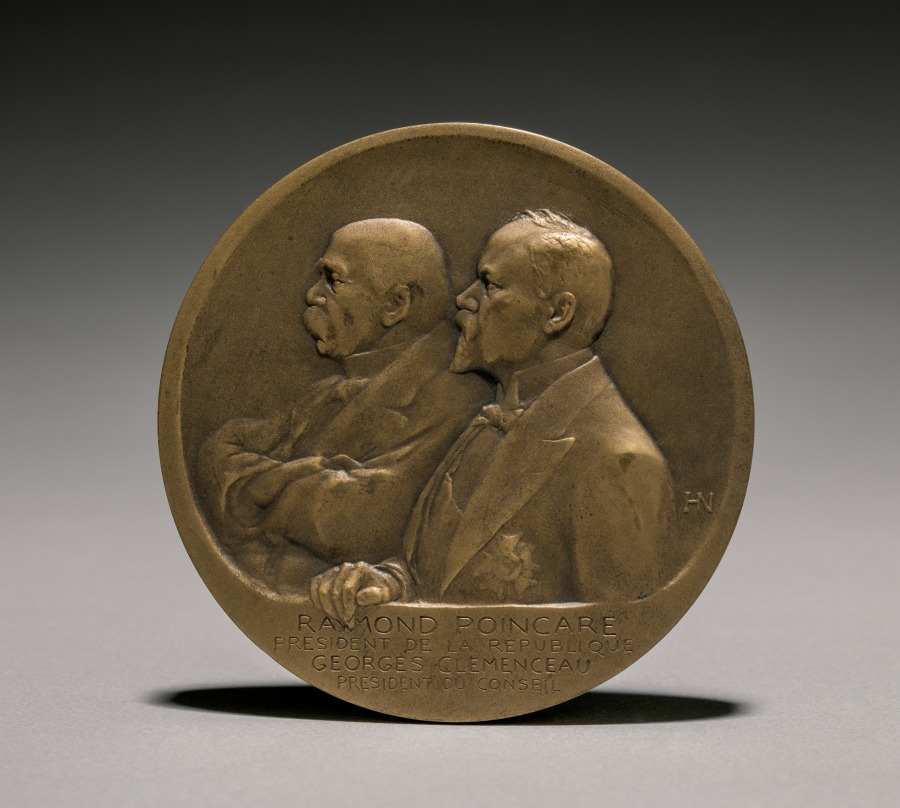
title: Poincare-Clemenceau Medal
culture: France, 20th century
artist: Henri Nocq (French, 1868–1942)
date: 1900s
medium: bronze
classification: Metalwork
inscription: obverse - "Raymond Poincare President de la Republique, Georges Clemenceau President du Conceil." reverse - "Metz - Strassbourg, Decembre 1918."